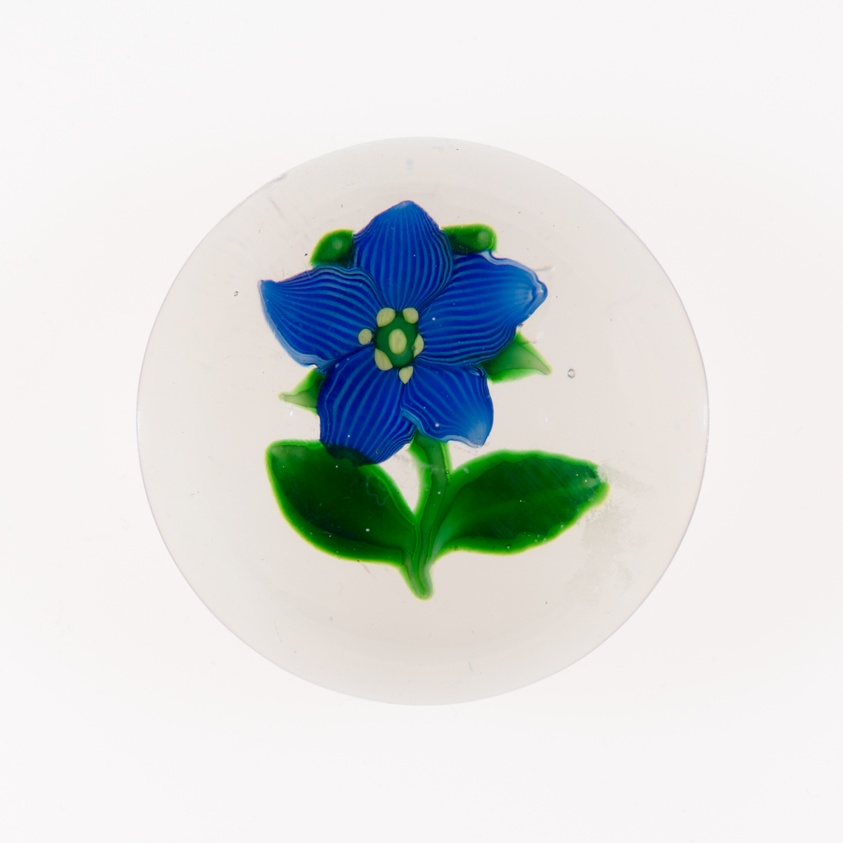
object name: Glass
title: Paperweight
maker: Clichy Glassworks (Cristalleries de Clichy); Clichy, France, 1837-1885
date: 19th century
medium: Glass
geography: Clichy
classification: paperweight; lampwork; european decorative arts; glass